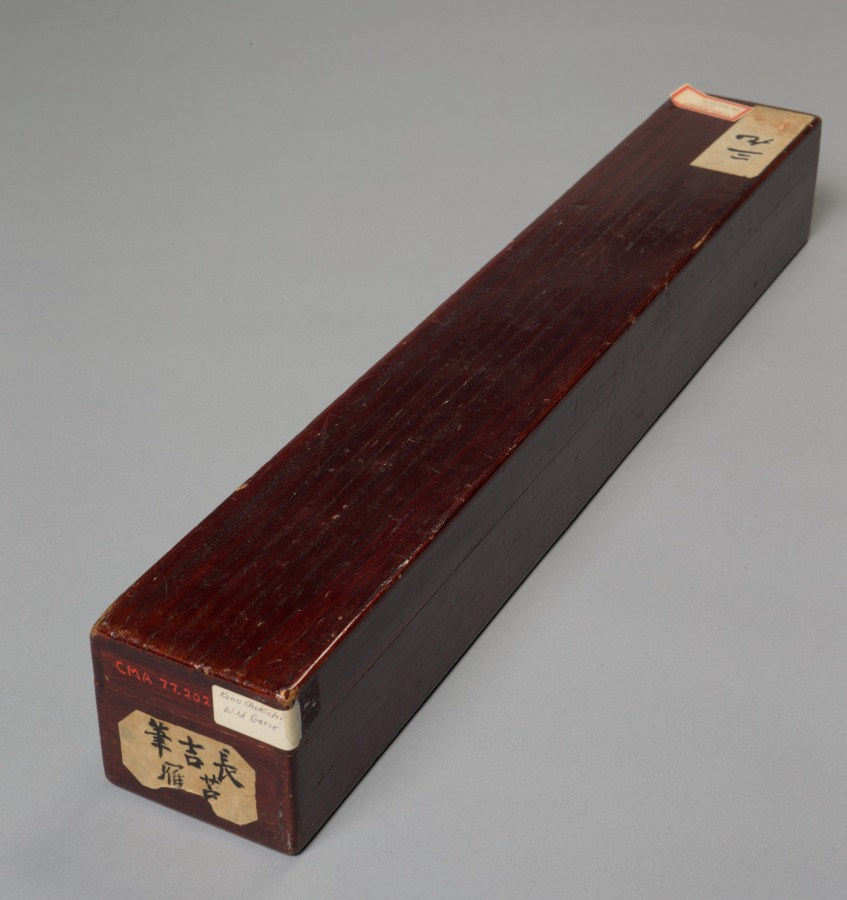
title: Wild Geese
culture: Japan, Muromachi period (1392–1573)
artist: Chōkichi (Japanese)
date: early 1500s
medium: hanging scroll; ink on paper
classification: Painting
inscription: Gourd-shaped seal of Chokichi at lower left